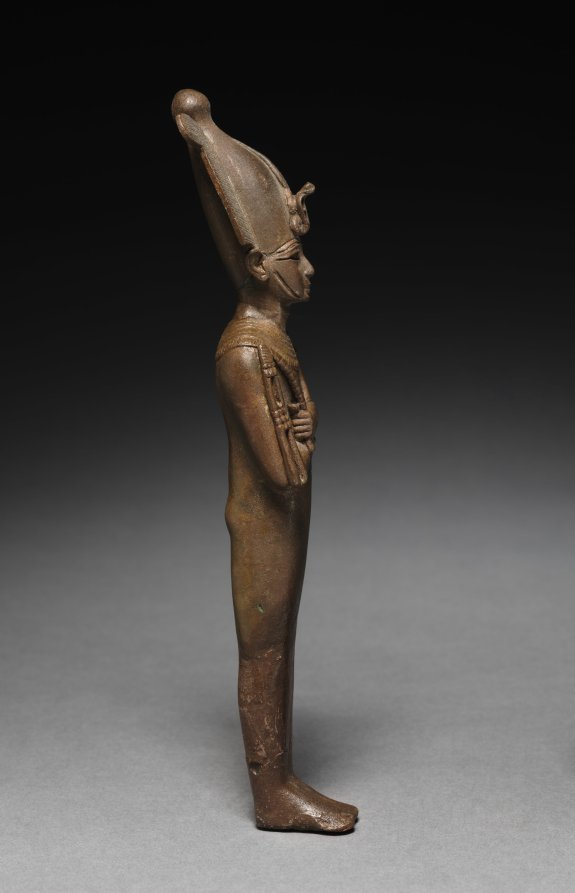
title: Statuette of Osiris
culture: Egypt, Late period (715–332 BCE), Dynasty 26 or later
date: 664–525 BCE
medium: bronze, hollow cast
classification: Sculpture